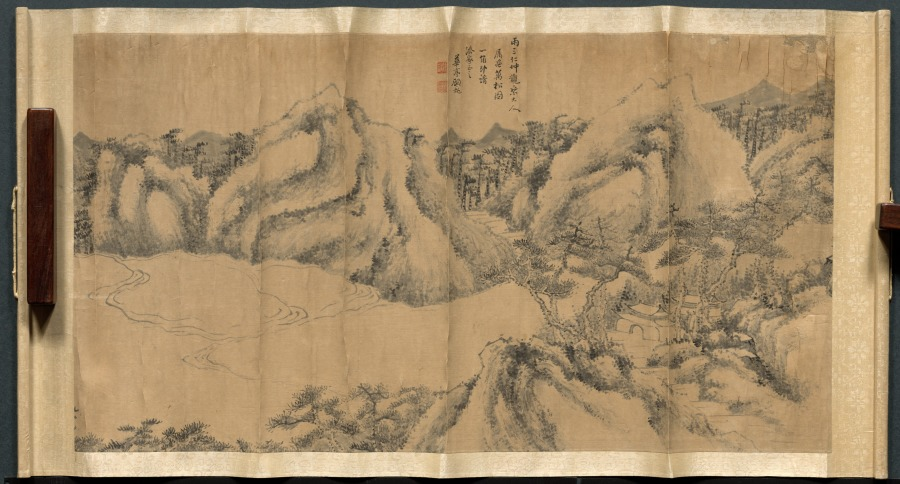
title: Pine-shaded Monastery on a Cloudy Mountain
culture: China, Qing dynasty (1644-1911)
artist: Gu Chao (Chinese, active late 1700s)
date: late 1700s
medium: handscroll, ink and slight color on paper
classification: Painting